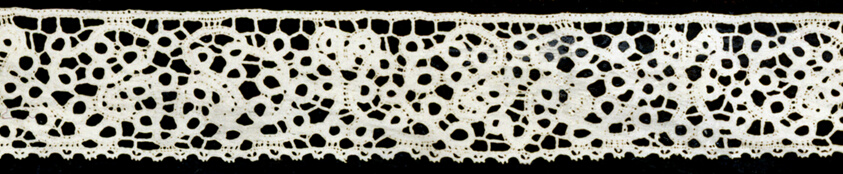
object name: Textile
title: Border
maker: Italy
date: 18th century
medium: Linen, bobbin straight lace (of continuous clothwork tapes; worked in large sections)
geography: Italy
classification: textile; lace - bobbin